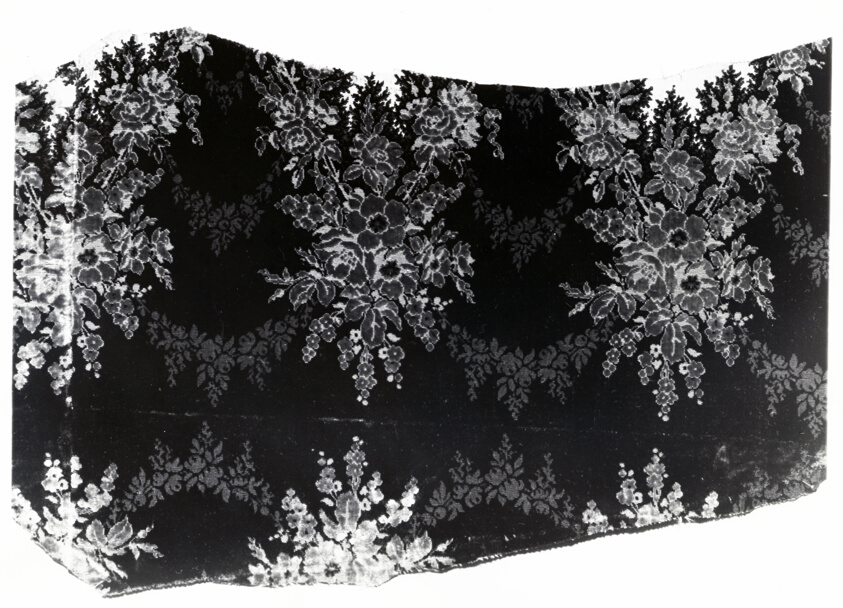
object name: Textile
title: Fragments (From a Vest)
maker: France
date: 19th century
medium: Silk, cut, uncut, voided velvet against plain weave foundation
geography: France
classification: textile; weaving - velvet